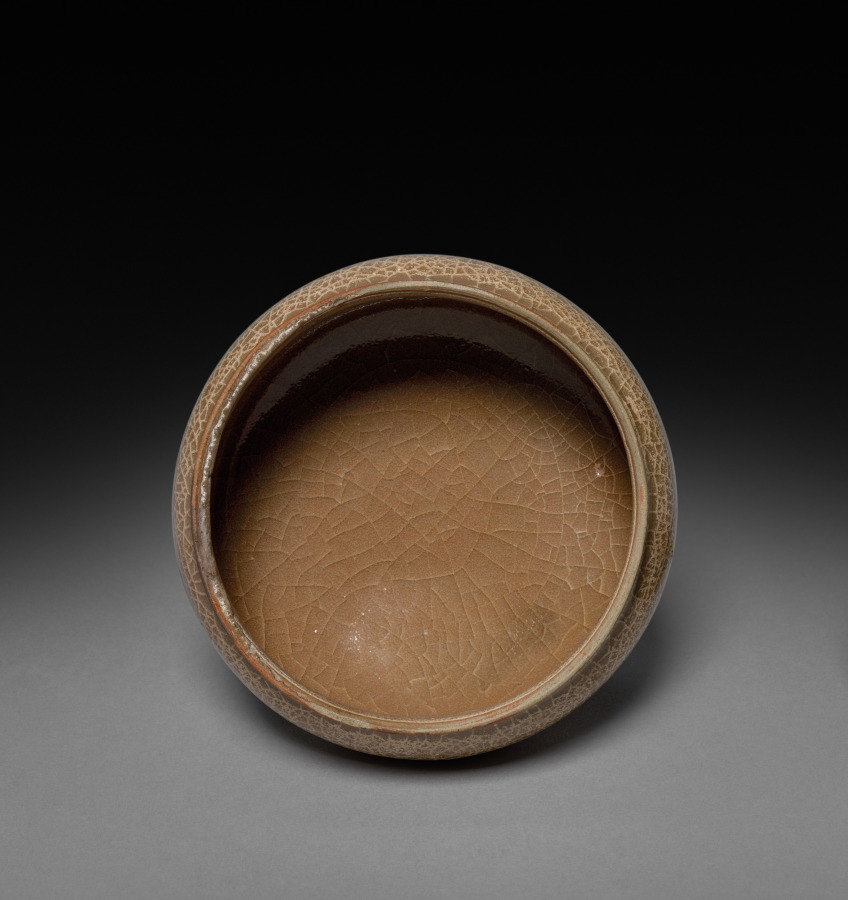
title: Covered Flat Jar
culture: China, Hangzhou, Suburban Altar Kiln, Southern Song dynasty (1127-1279)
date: 1127–1279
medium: glazed buff stoneware, Guan ware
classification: Ceramic